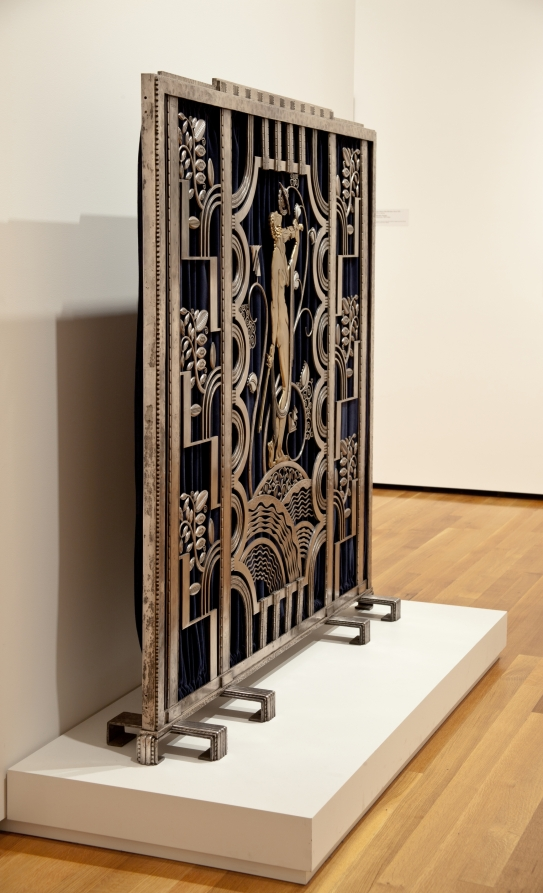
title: Muse with Violin Screen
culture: America, Ohio, Cleveland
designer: Paul Fehér (American, born Hungary, 1898–1990)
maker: Rose Iron Works (America, Ohio, Cleveland, est. 1904)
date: 1930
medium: Steel, brass; silver and gold plating, cotton velveteen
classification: Metalwork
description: Since the early years of the 20th century, the Rose Iron Works, a Cleveland supplier of architectural ornament, has produced distinguished metalwork. The company’s founder, Martin Rose, was born in Austria-Hungary and studied ornamental metalsmithing in Vienna prior to immigrating to Cleveland in 1902. In the 1920s, he hired a talented young Parisian designer, Paul Fehér, to work for the firm. Fehér’s designs, culminating in this massive screen, brought a modern European sensibility to the Rose Iron Works production. With its geometric patterning, highly stylized and abstracted natural forms, and the central figure reminiscent of the celebrated jazz singer Josephine Baker, this screen reflects the classic motifs of Art Deco design.